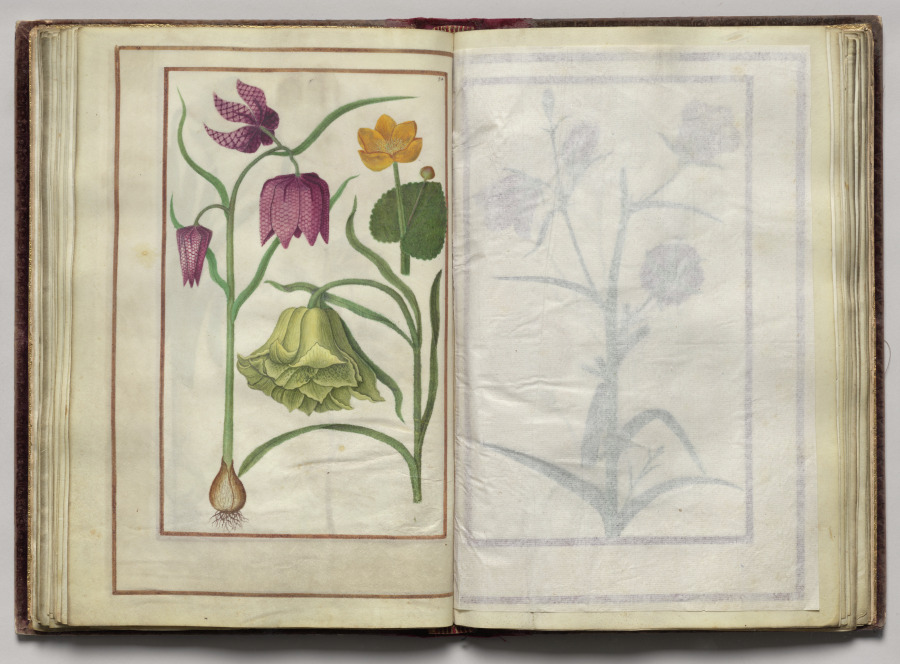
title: Florilegium (A Book of Flower Studies)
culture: France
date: 1608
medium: bound manuscript of 48 leaves, 77 drawings; watercolor, ink, silver, and gold over occasional traces of pencil, on vellum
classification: Bound Volume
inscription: Dated: Poitiers 1608 (on frontispiece) Signed: On frontispiece in black ink, lower right: Van Kuyk Notation on drawing: Frontispiece: in pencil, lower margin: * élève de Van Kessel, peintre flammand (* in pencil also appears in front of Van Kuyk's name).